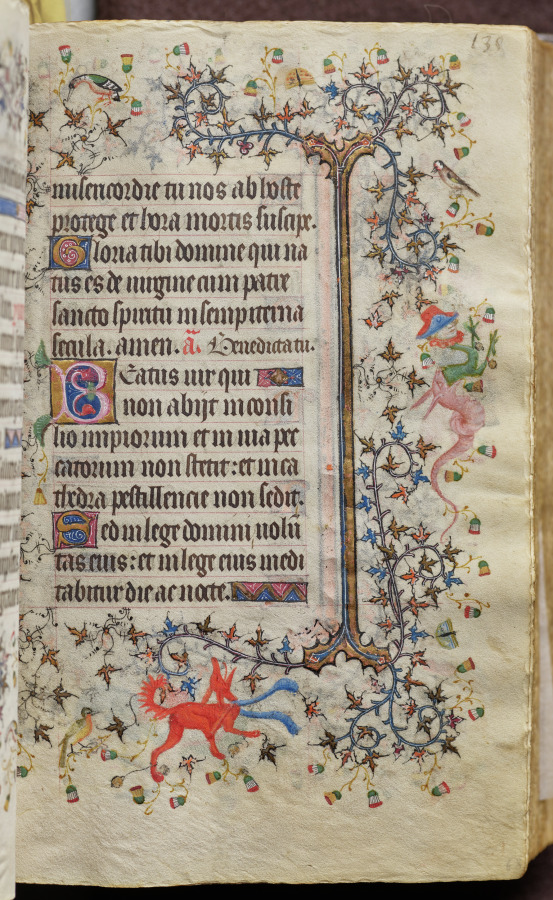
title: Hours of Charles the Noble, King of Navarre (1361-1425): fol. 68r, Text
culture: France, Paris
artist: Master of the Brussels Initials and Associates (French)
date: c. 1405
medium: ink, tempera, and gold on vellum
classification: Bound Volume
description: This precious volume was obviously highly prized by its owner, the French-born King of Navarre, who had his coat of arms painted on no less than twenty folios. Rather than directly commissioning this manuscript from a specific workshop, it seems that Charles the Noble acquired his book of hours -- perhaps ready-made for the luxury market -- while on a trip to Paris in 1404-05. A collaborative effort, six painting styles are evidenced within the pages of this codex, those of two Italians, two Frenchmen, and two Netherlanders. The painter who was responsible for the planning and decoration of the book, and who produced seventeen of the large miniatures, was a Bolognese artist known as the Master of the Brussels Initials. His principal assistant, responsible for most of the borders, was a Florentine who signed his name "Zecho" da Firenze on folio 208 verso.